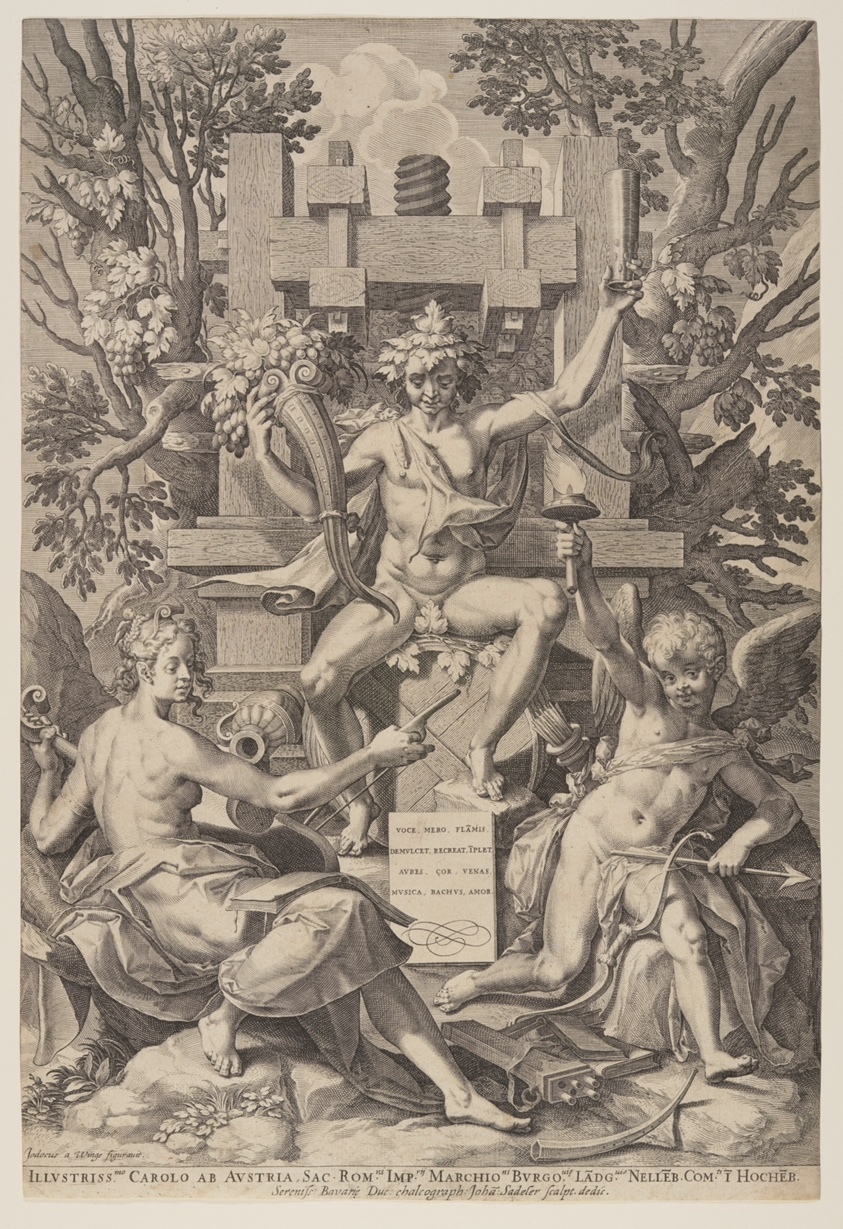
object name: Print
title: Bacchus Seated on a Barrel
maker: Jan Sadeler I (Flemish, 1550–1600); after Joos van Winghe (Flemish, 1544–1603)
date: c. 1590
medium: Engraving on ivory laid paper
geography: Flanders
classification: engraving; paper; print; prints and drawing